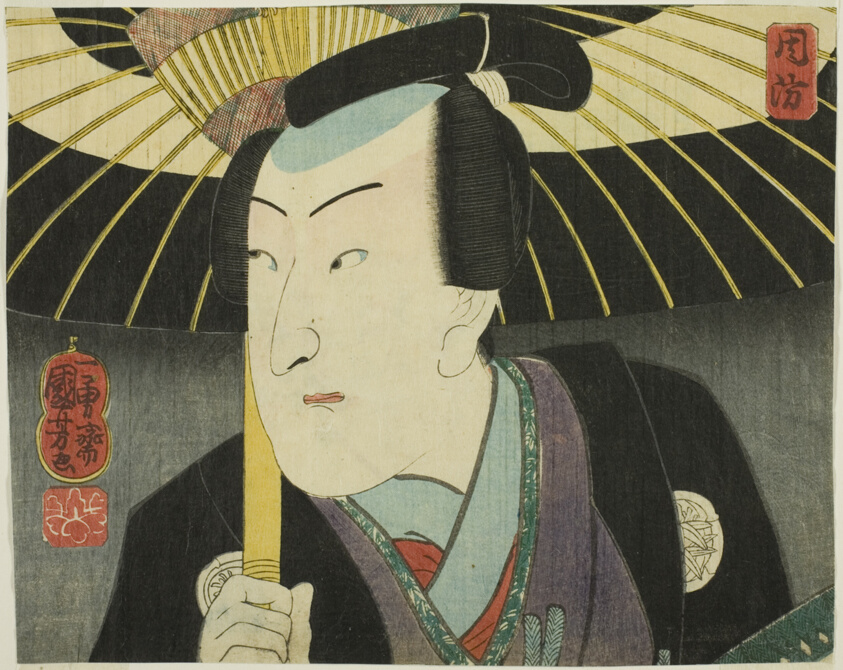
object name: Print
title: Suo Province, from the series "Modern Scenes of the Provinces in Edo Brocades (Edo nishiki imayo kuni zukushi)"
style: Japanese (culture or style)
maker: Utagawa Kuniyoshi (Japanese, 1797–1861)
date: 1852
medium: Color woodblock print; bottom half of oban sheet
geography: Japan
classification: woodblock print; print; asian art